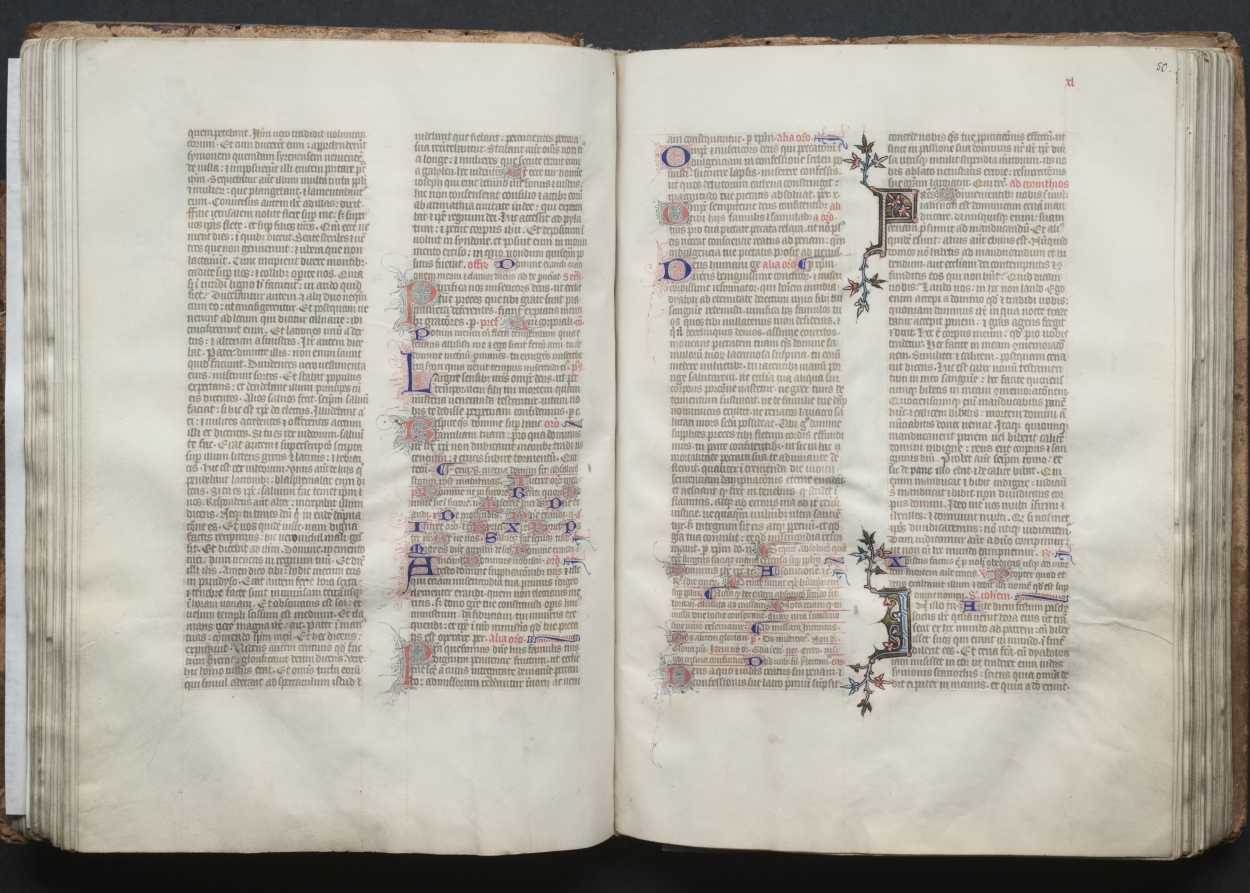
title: The Gotha Missal: Fol. 50r, Text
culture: France, Paris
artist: Master of the Boqueteaux (French)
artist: and Workshop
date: c. 1375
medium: ink, tempera, and gold on vellum; blind-tooled leather binding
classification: Bound Volume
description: The style and quality of this manuscript's decoration is typical of deluxe Parisian books made for aristocratic or royal patrons. Most of the book's decoration appears to be the work of the Master of the Boqueteaux, an artist active at the court of King Charles V (died 1380). His style was apparently shared by a number of book illuminators working in and around Paris. It is very possible that the Gotha Missal belonged to Charles V, but is not provable because the manuscript has no royal portraits and lacks a colophon. Given the book's magnificent decoration, however, it would seem that it was produced for a Valois prince, if not for the king himself. The manuscript receives its name from the German dukes of Gotha, its later owners.